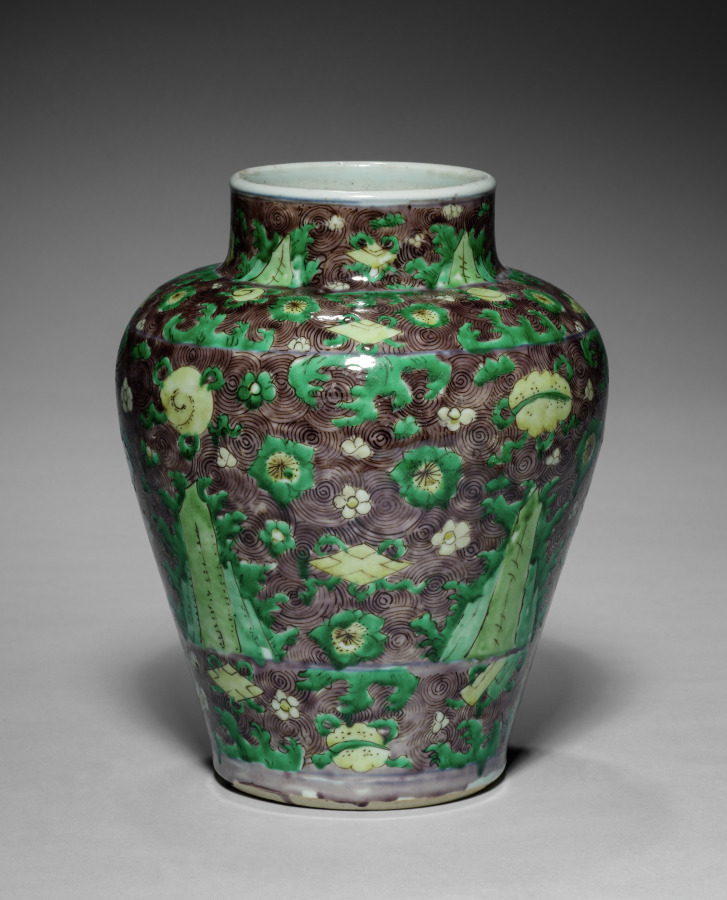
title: Baluster Jar and Cover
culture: China, Jiangxi province, Jingdezhen kilns, Ming dynasty (1368–1644) or Qing dynasty (1644–1911)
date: 1600–1650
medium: Porcelain with wucai (five-color) enamels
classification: Ceramic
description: The central motif on this jar is a mountain emerging from the sea, symbolizing Mount Sumeru in Buddhist cosmology, and representing the central axis in the universe in Daoism. White cherry blossoms floating on the wavy ground are surrounded by auspicious symbols such as the coin for wealth and the lozenge for victory. The yellow knob on the jar’s cover depicts a cherry blossom. Other fortuitous motifs—such as the leaf of protection, the pearl to grant wishes, the stone chime for celebration, rocks symbolizing longevity—also decorate the lid. While most jars have lost their covers over time, this jar retains its original lid.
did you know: The waves are depicted in a rich aubergine, or purple, glaze.